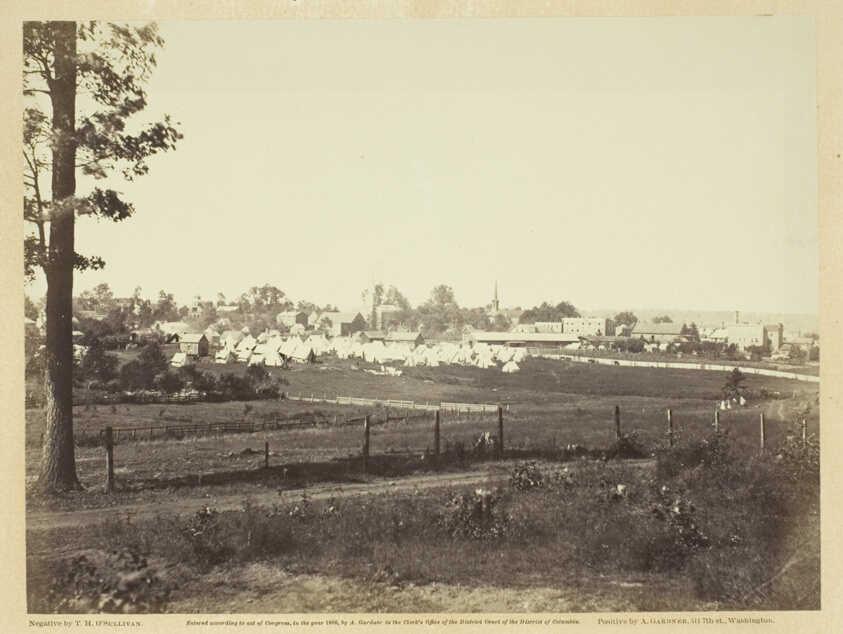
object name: Photograph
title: Culpeper, Virginia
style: 19th century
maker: Timothy O'Sullivan (American, born Ireland, 1840–1882)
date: November 1863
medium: Albumen print, pl. 48 from the album "Gardner's Photographic Sketch Book of the War, vol. 1" (1866)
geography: United States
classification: photograph; albumen silver print; photography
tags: Collected by Hugh Edwards, Gardner's Photographic Sketch Book